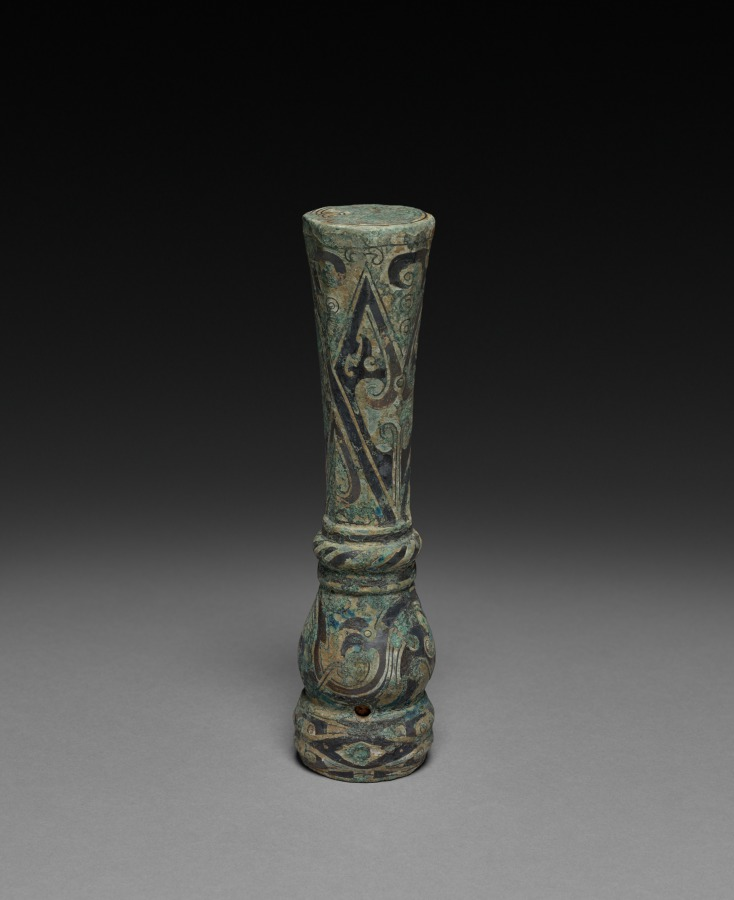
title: Shaft Mounting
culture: China, Eastern Zhou dynasty (770–256 BCE), Warring States period (475–221 BCE)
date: 500–300 BCE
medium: bronze inlaid with gold and silver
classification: Metalwork